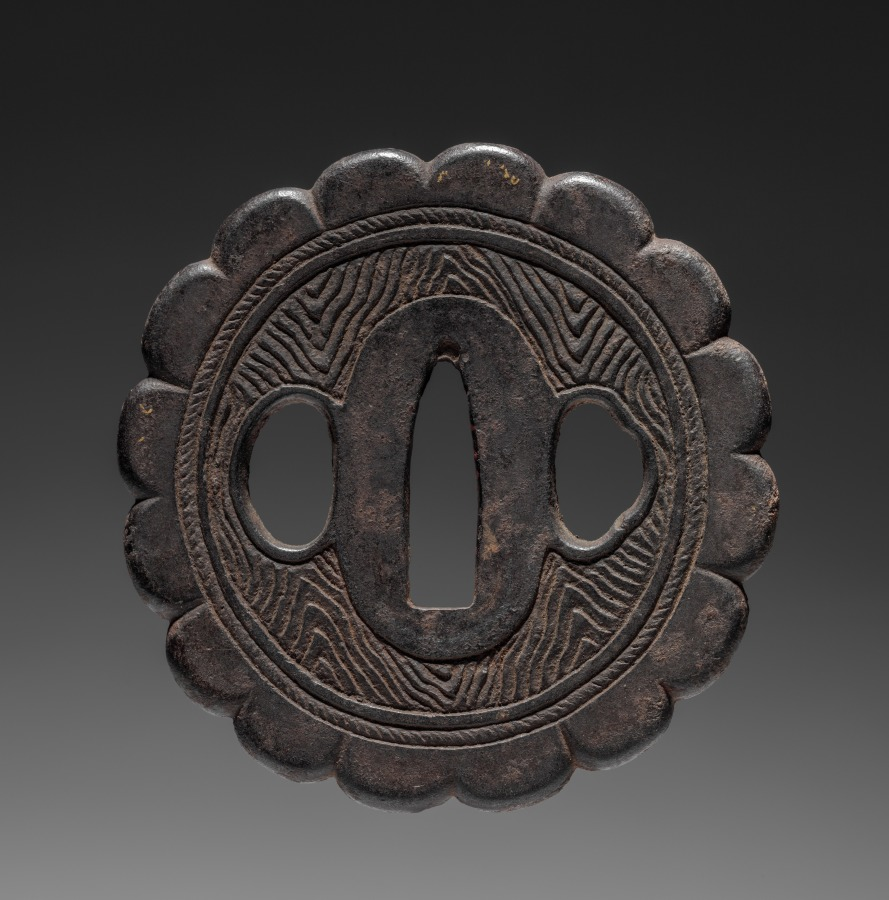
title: Sword Guard (Tsuba)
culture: Japan, possibly Edo period (1615-1868)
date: c. 1615–1868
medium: iron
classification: Arms and Armor